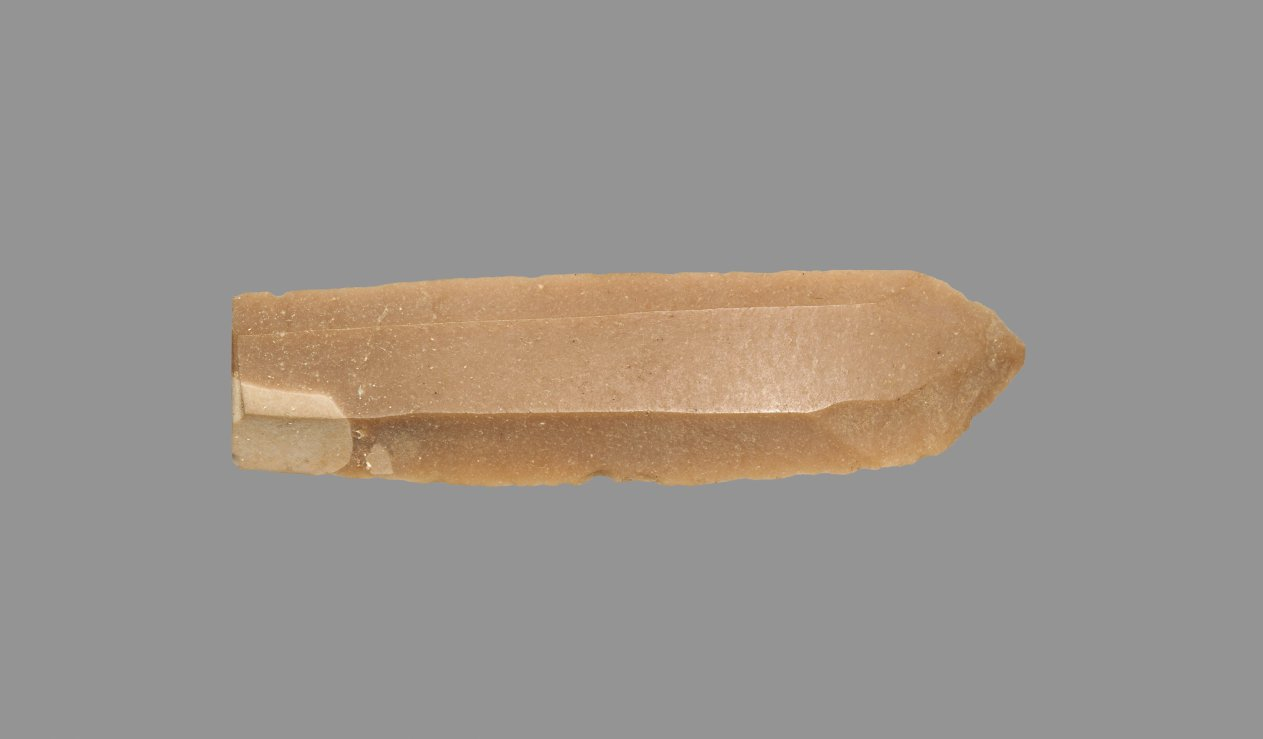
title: Sickle Blade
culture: Egypt, Middle Kingdom (2040–1648 BCE), Dynasty 12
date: 1980–1801 BCE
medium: flint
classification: Implements